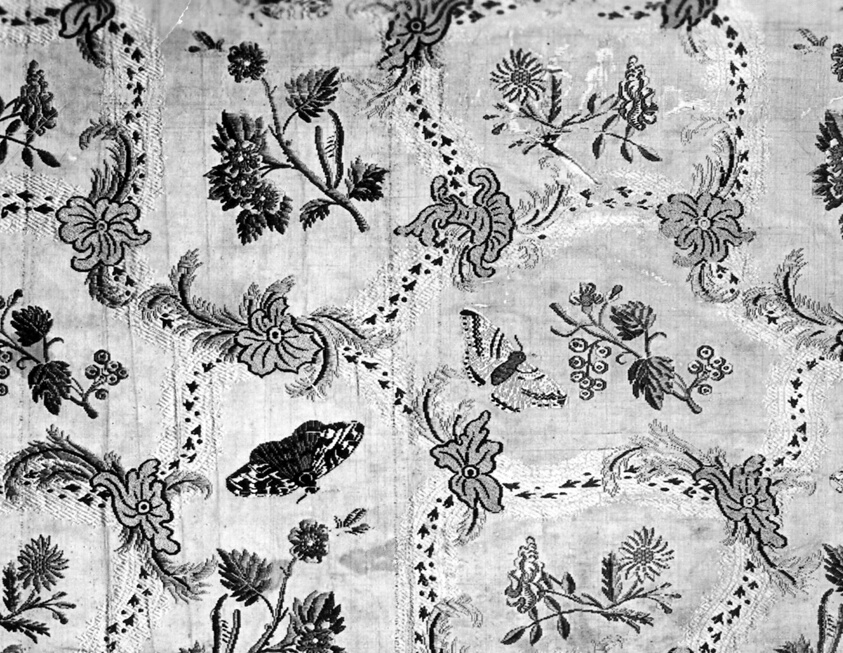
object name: Textile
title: Fragment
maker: France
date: 18th/19th century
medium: Silk, brocaded plain compound cloth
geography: France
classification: textile; weaving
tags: botanical/floral